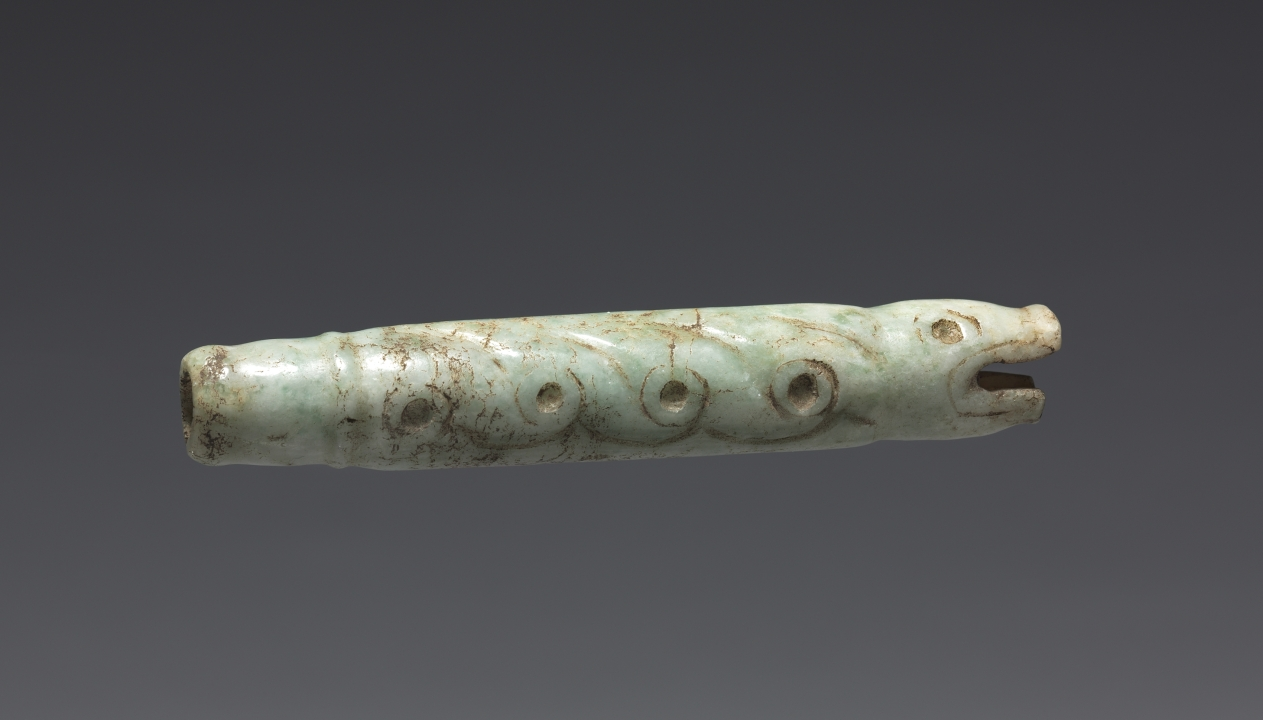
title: Serpent-form Fan Handle(?)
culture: Central Mexico, Mixtec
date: 900–1519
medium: pale green jade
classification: Sculpture